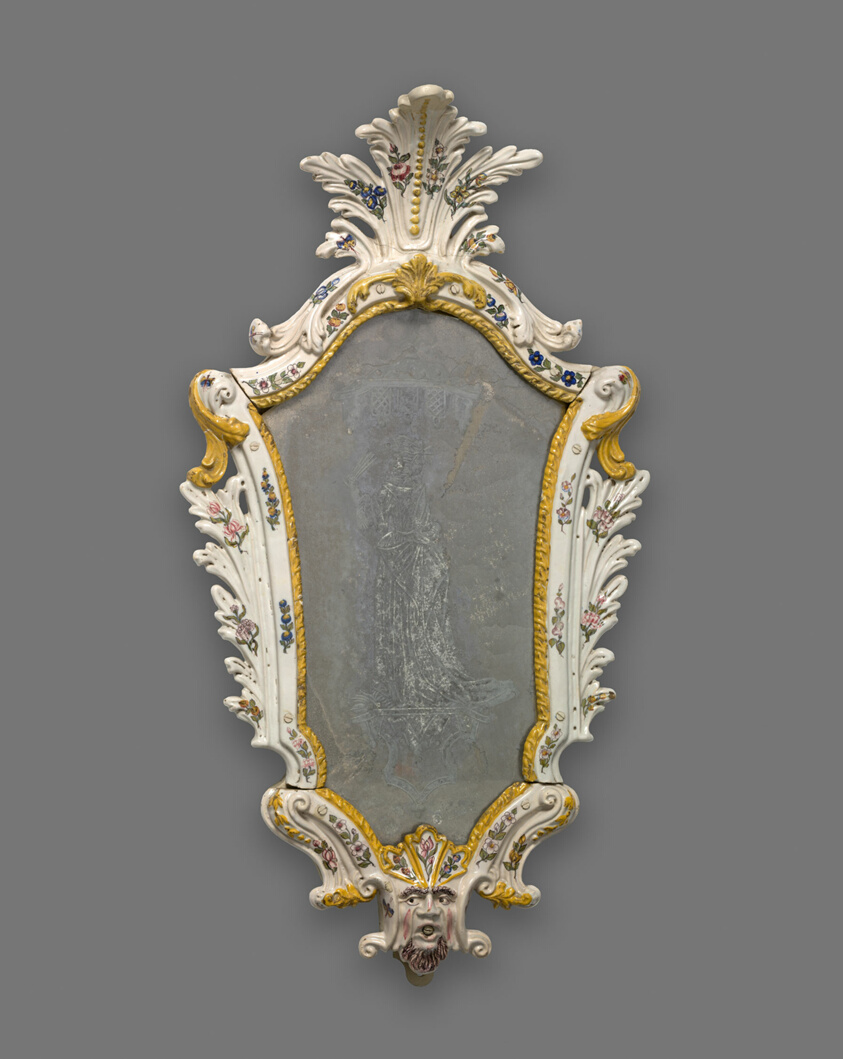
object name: Ceramics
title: Mirror: Female Harlequin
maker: Italy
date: 1740/60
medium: Tin-glazed earthenware (faience) and mirror glass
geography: Italy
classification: earthenware; mirror; furniture; ceramics; european decorative arts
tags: furniture